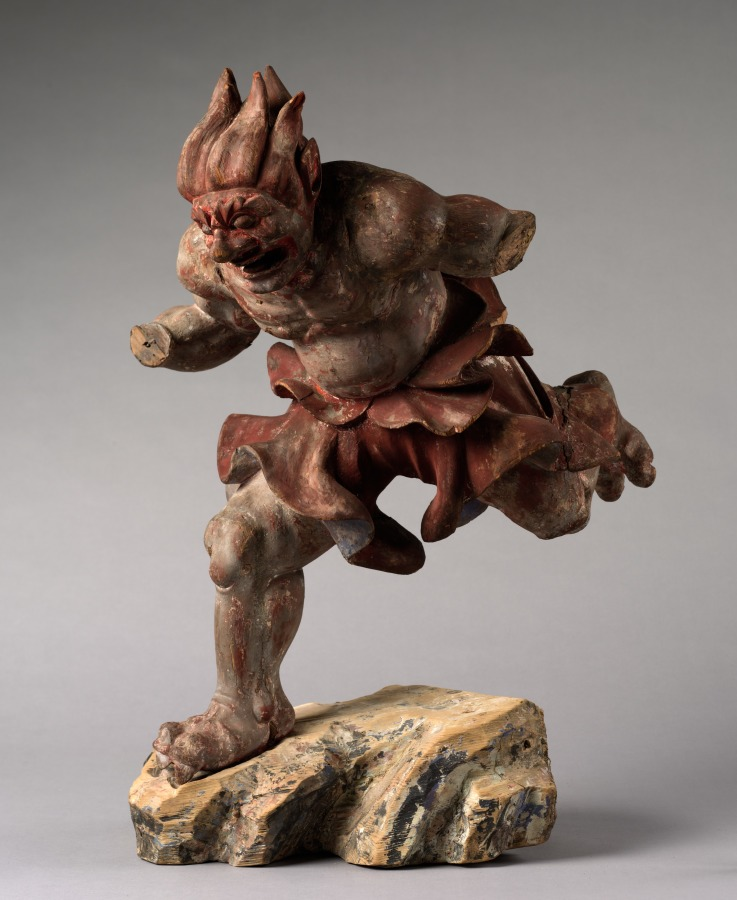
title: Thunder God (Raijin)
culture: Japan, Kamakura period (1185–1333)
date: 1300s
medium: wood with traces of gesso and red and black pigment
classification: Sculpture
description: The Thunder (Raijin) and Wind (Fujin) gods first appeared in early Buddhist art in China and Japan and were based on the popular imagery in India that was derived from the life of the historical Buddha, Shakyamuni. They were shown among a group of demon-monsters flying through the sky above the meditating Shakyamuni in an attempt to frighten away his concentration. Raijin is surrounded by a ring of small drums struck by a stick held in his hand so that he is always accompanied by a thunderous noise. A metal clasp protruding from this sculptures' back indicates that a ring of drums was once attached to the Cleveland Raijin. The matching sculpture, Fujin, is in the Fukuoka Art Museum in Japan.